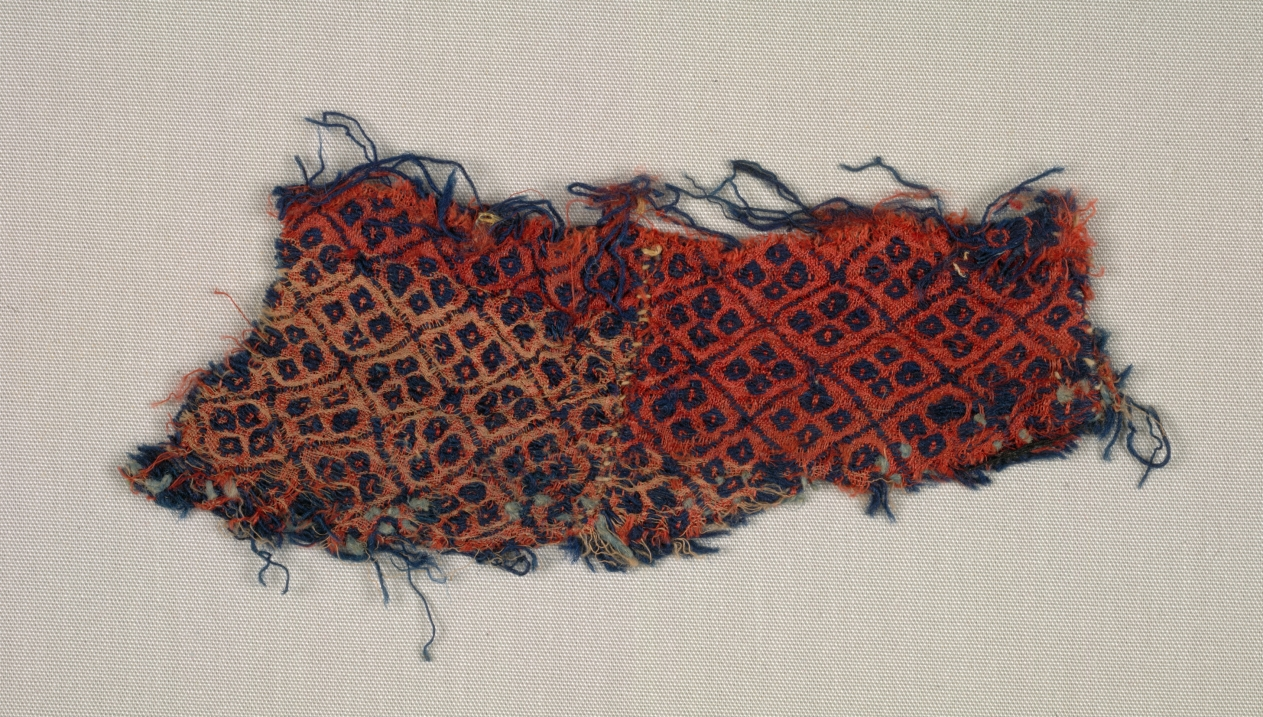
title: Fragment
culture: Germany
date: 1400s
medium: patterned weave; wool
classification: Textile